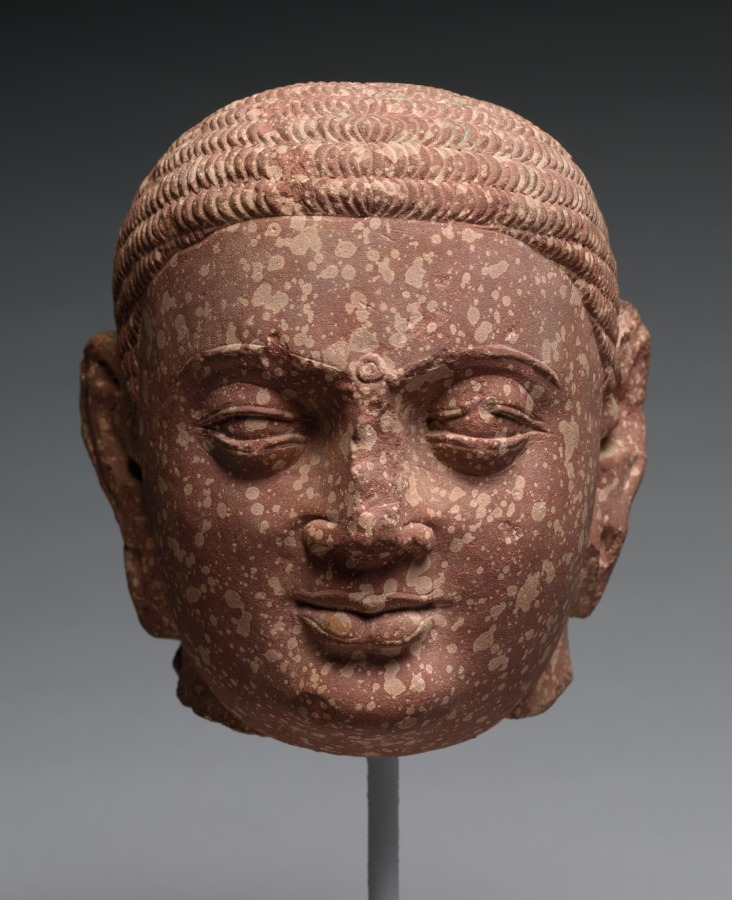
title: Head of Jina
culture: India, Mathura, Kushan period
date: c. 150–75 CE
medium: red mottled sandstone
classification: Sculpture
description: The short rows of hair show the new growth after this figure pulled out every lock by hand. Such a radical act demonstrated renunciation from a society that dictated the wearing of long hair to be covered by a turban. Since there is no protrusion at the top of the head, he can be recognized as a Jina, rather than a Buddha or other holy man. His slight smile and placid alert gaze communicate the power, bliss, and wisdom of one who has reached a state of pure knowing and liberation from delusions.